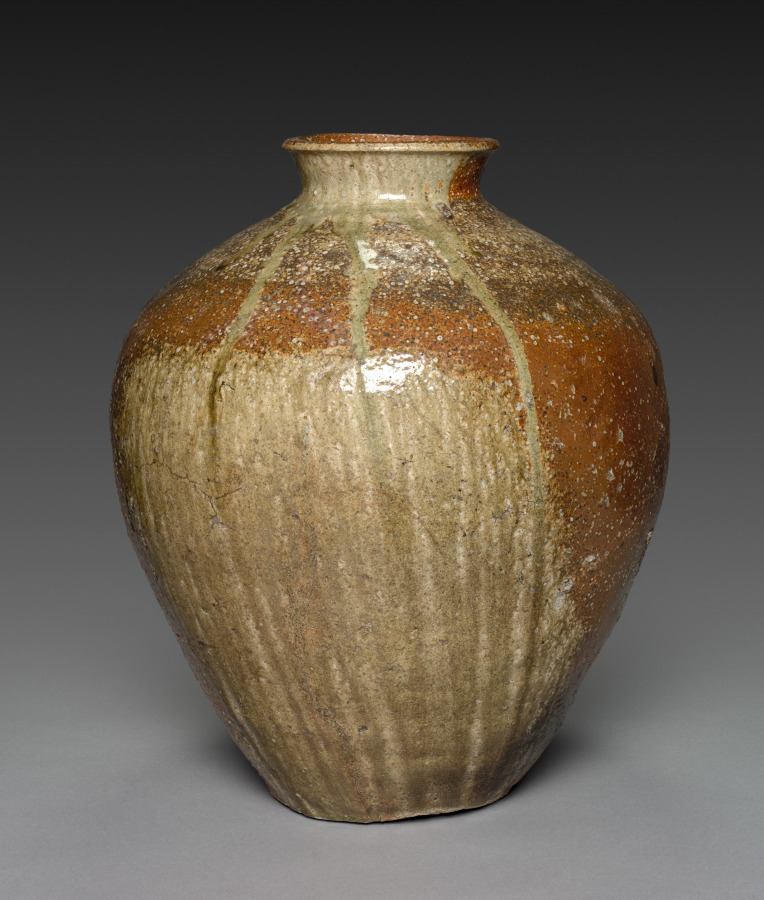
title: Storage Jar (Tsubo)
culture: Japan, Muromachi period (1392–1573)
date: late 1400s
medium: Stoneware with natural ash glaze (Shigaraki ware)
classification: Ceramic